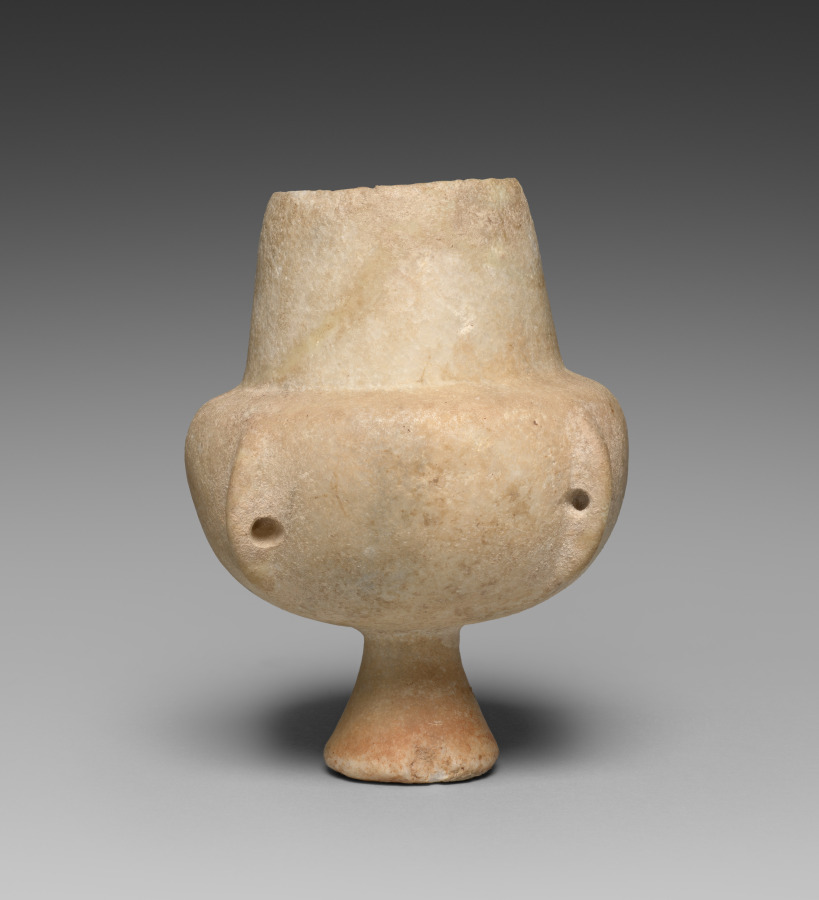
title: Kandila (Collared Jar with Conical Foot)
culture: Greece, Cycladic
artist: Master A (Greek)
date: 3000–2950 BCE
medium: marble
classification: Sculpture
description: Kandila, the modern Greek word used by archaeologists for Early Cycladic stone jars like this one, also refers to a type of hanging oil lamp, similar in shape but made of metal and still used in some Greek Orthodox churches. Despite this name and the formal similarity, the primary function of the prehistoric kandila remains uncertain. The holes drilled through each of its four lugs may have been used for hanging or to secure a lid.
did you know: "Cycladic" refers to a group of Aegean islands where vessels like this were made.